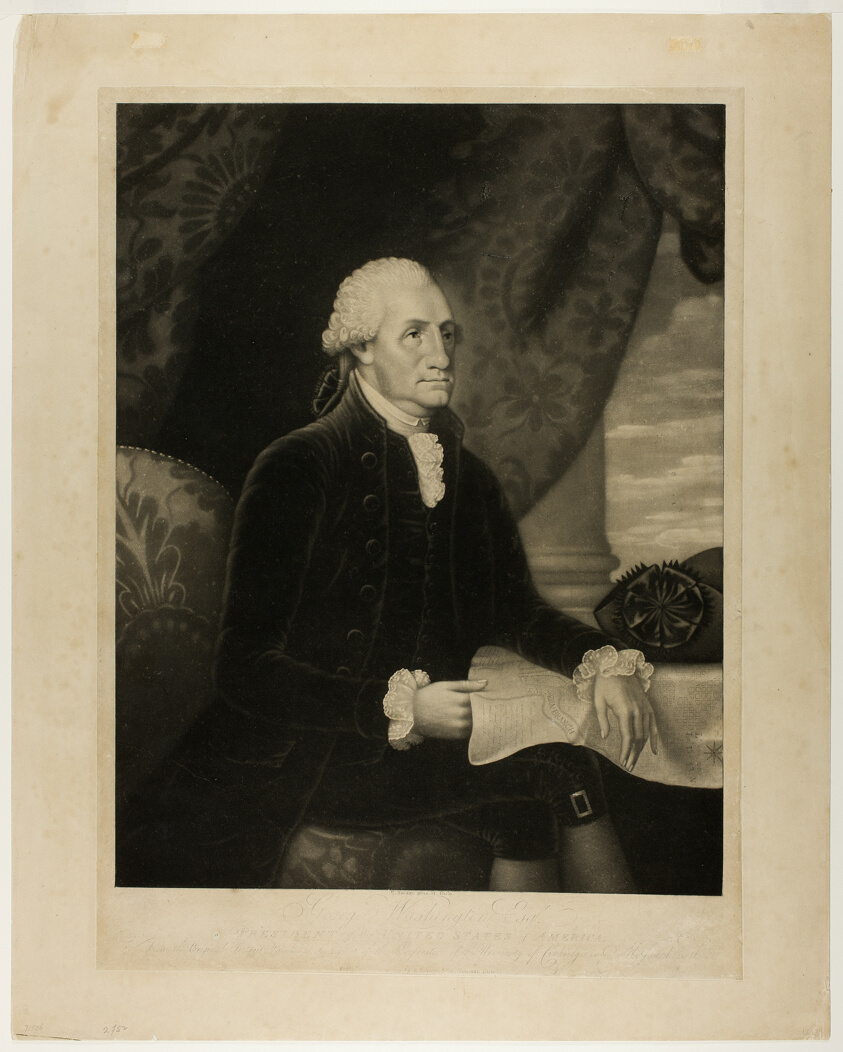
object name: Print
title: George Washington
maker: Edward Savage (American, 1761–1817)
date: 1793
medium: Mezzotint with engraving in black on cream wove paper, laid down on cream wove paper (chine collé)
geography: United States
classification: mezzotint; print; prints and drawing